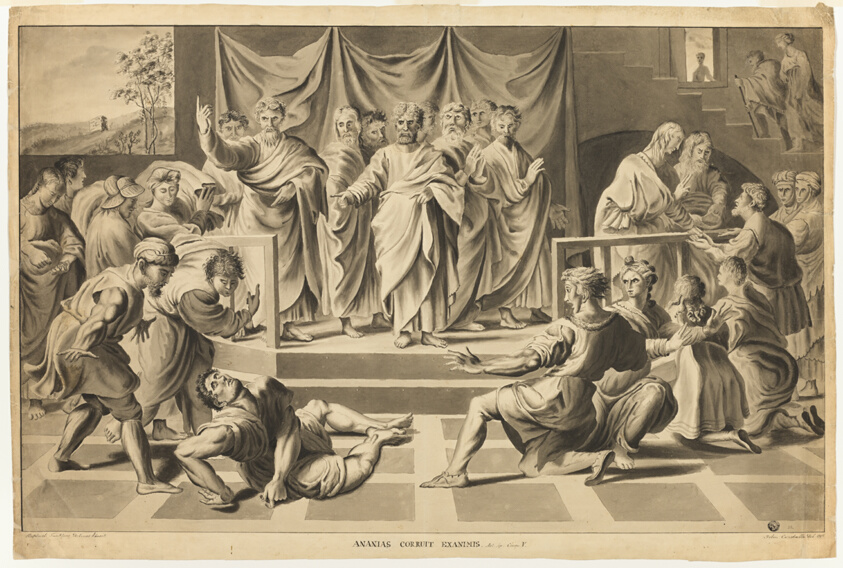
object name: Drawing and Watercolor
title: Death of Ananias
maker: John Constable (English, 1776-1837); or after Raffaello Sanzio, called Raphael (Italian, 1483-1520)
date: 1795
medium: Pen and black ink and brush and black ink and gray wash on cream wove paper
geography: England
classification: ink and wash; drawings (visual works); prints and drawing